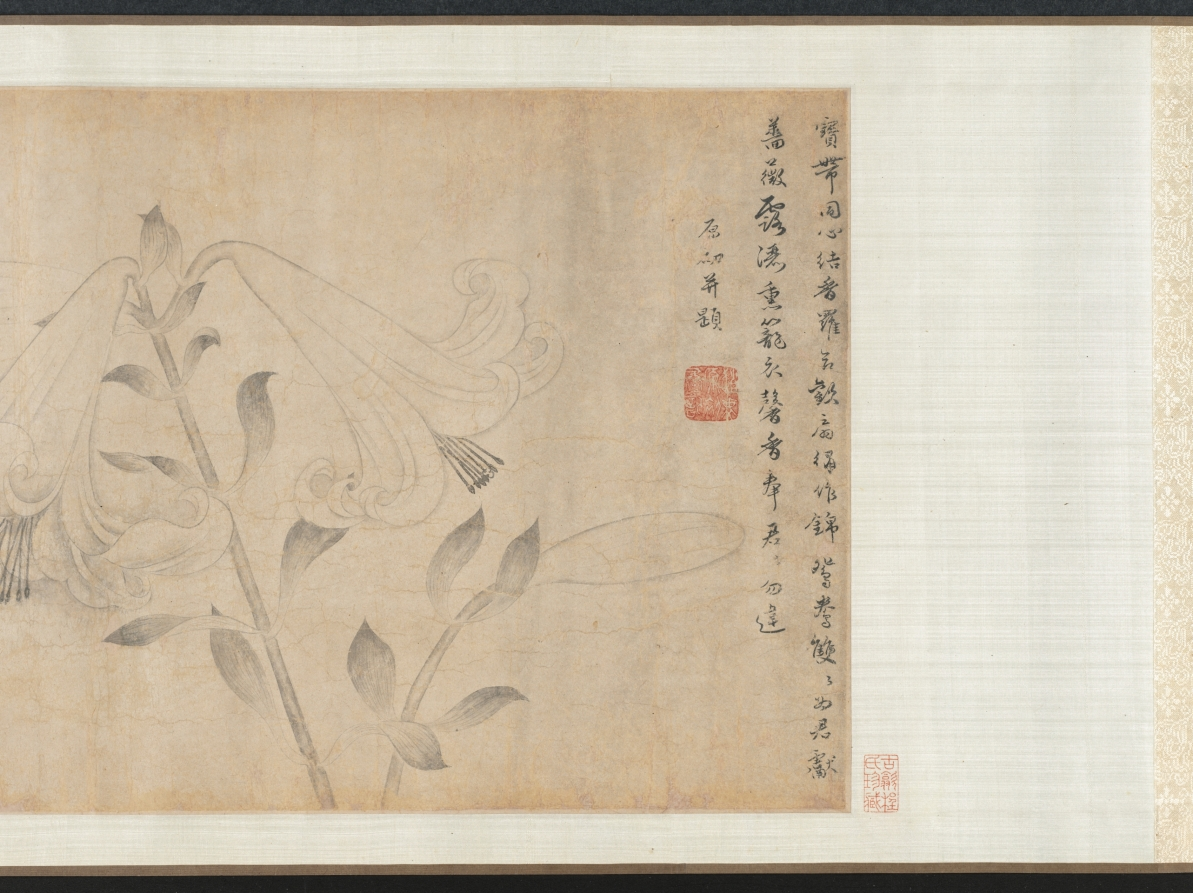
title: Ink Flowers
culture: China, Yuan dynasty (1271-1368)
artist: Zhao Zhong (Chinese, second half of the 1300s)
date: 1361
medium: Handscroll; ink on paper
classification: Painting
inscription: 寶帶同心結，香羅合歡扇。/ 繡作錦鴛鴦，雙雙為君獻。/ 薔薇露灑熏籠衣，馨香奉君君勿違。 原初并題。 [印] 趙衷原初畫記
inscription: 翠袂素羅韈，玉臺黃金盃。浩歌渡弱水。天風卷海三山開，麻姑方平為招飲，蛟宮獻舞銀濤堆。 原初并題。 [印] 雲林清趣、[印] 趙衷原初畫記。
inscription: 右用湯叔雅慶元中所寫墨花法作此卷，又效李長吉體賦詩以題之。詩與畫雖未工，要皆出於古人之餘，譬猶欲成方圓而必求其規矩之用也，識者毋誚焉！至正辛丑八月望日，東吳野人趙衷原初謹識。 [印] 趙原初、[印] 傳世清玩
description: Zhao Zhong's flowers, each paired with a poem, echo the fine-style colored flowers of the academic tradition, but instead he used only ink. Fine lines define the contours of each plant, as well as the veins within each petal and leaf. Careful ink washes give subtle modeling to the forms. The combination of lily, narcissus, and peony is unusual as the three belong to no known seasonal or symbolic system popular in the fourteenth century. Zhao’s medical training may have influenced the selection. Powdered lilies, for example, were prescribed to dispel grief, while the bark of tree peony roots was used as a treatment for various blood disorders.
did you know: This handscroll is a very rare example of ink flowers in the linear baimiao style of the fourteenth century.